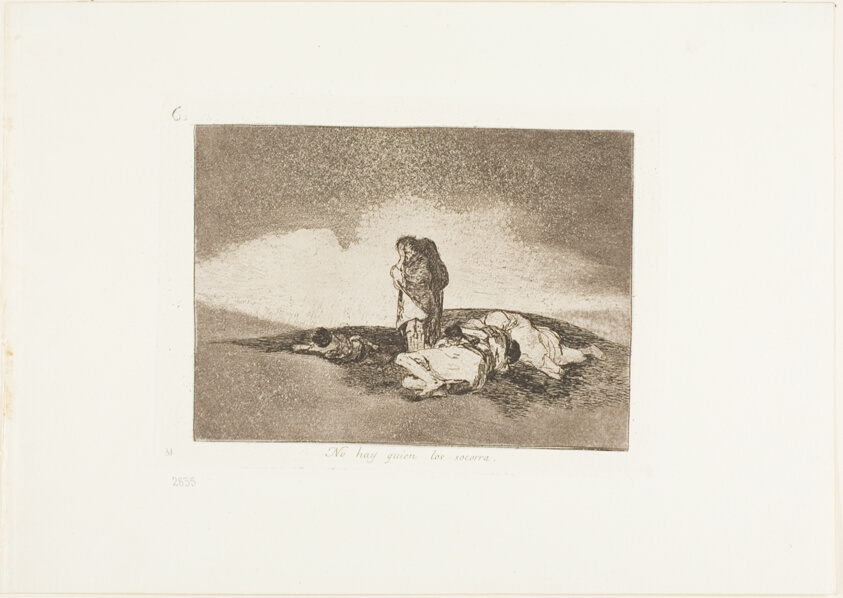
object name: Print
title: There is No One to Help Them, plate 60 from The Disasters of War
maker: Francisco José de Goya y Lucientes (Spanish, 1746-1828)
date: 1812/15, published 1863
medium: Etching, burnished aquatint and burin on ivory wove paper with gilt edges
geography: Spain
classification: etching; print; prints and drawing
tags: war